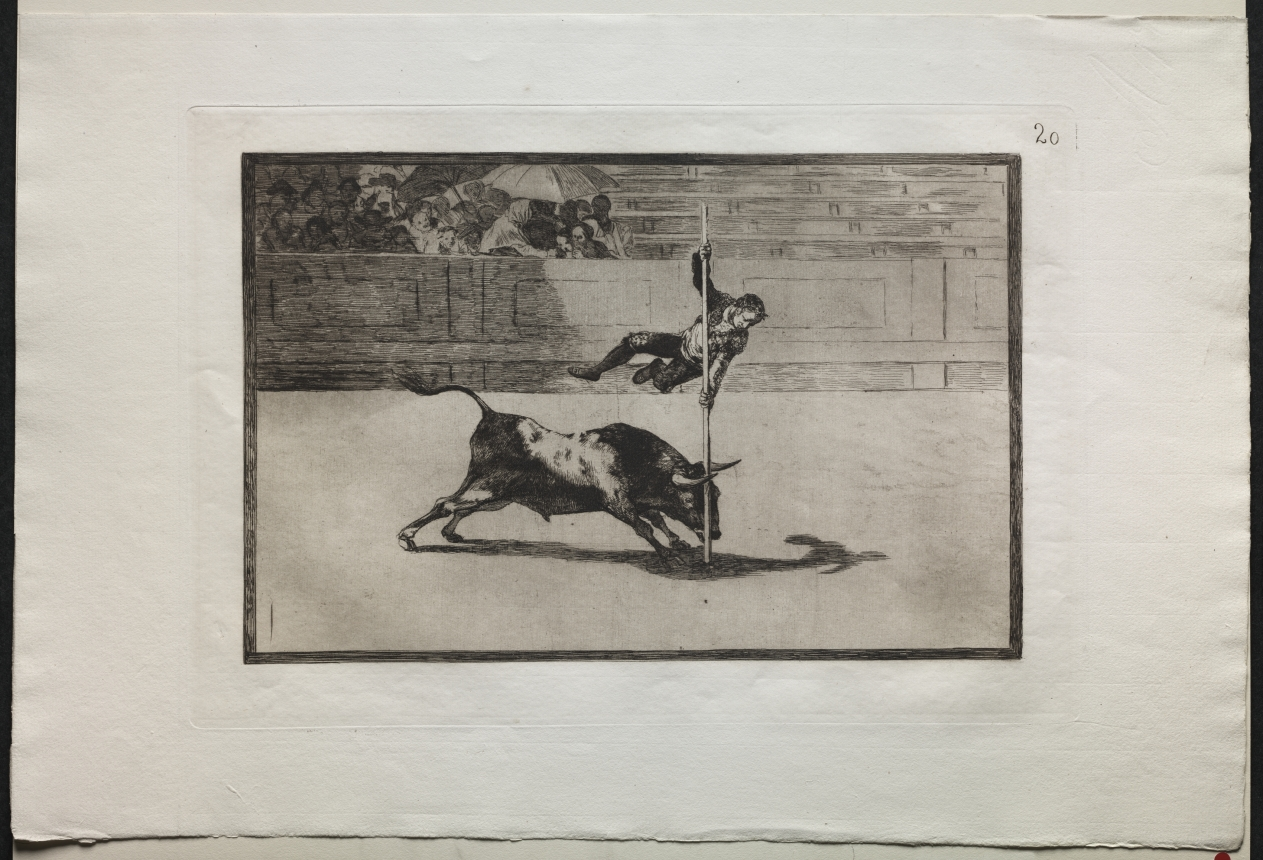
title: Bullfights: The Agility and Audacity of Juanito Apinani in (the Ring) at Madrid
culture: Spain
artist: Francisco de Goya (Spanish, 1746–1828)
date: 1816, printed 1876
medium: engraving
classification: Print